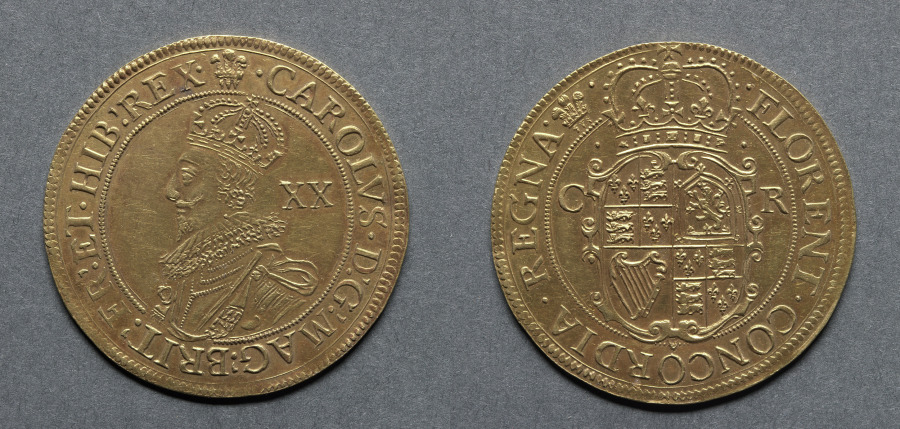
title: Unite: Charles I (obverse); Crowned Shield (reverse)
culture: England, Charles I, 1625-1649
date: 1630–1631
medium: gold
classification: Coins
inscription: CAROLUS DG MAG BRIT FR ET HIB REX, XX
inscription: FLORENT CONCORDIA REGNA, CR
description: When compared with the Charles I Unite struck in 1625 (1969.192), the finer work and clarity of detail in this work is remarkable. This coin and others of the same period were likely struck by the same form of mechanical process, although this was probably struck as a proof and not meant for circulation.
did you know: The unite was named after the legends on the coin indicating the king's intention of uniting his two kingdoms of England and Scotland.